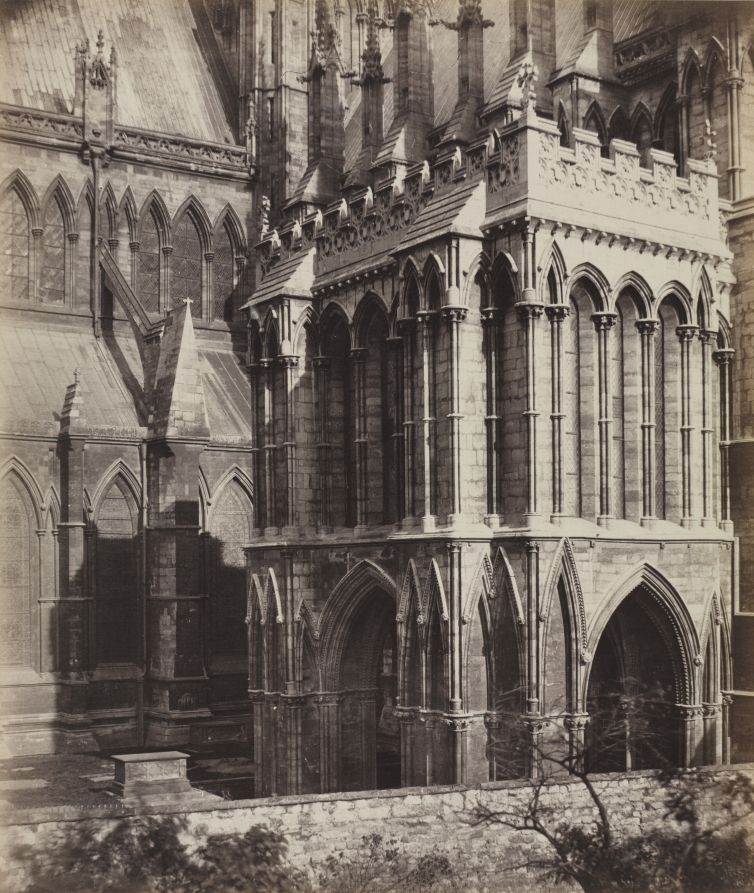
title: Lincoln Cathedral: The Galilee Porch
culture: England, 19th century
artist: Roger Fenton (British, 1819–1869)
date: c. 1857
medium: albumen print from wet collodion negative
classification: Photograph